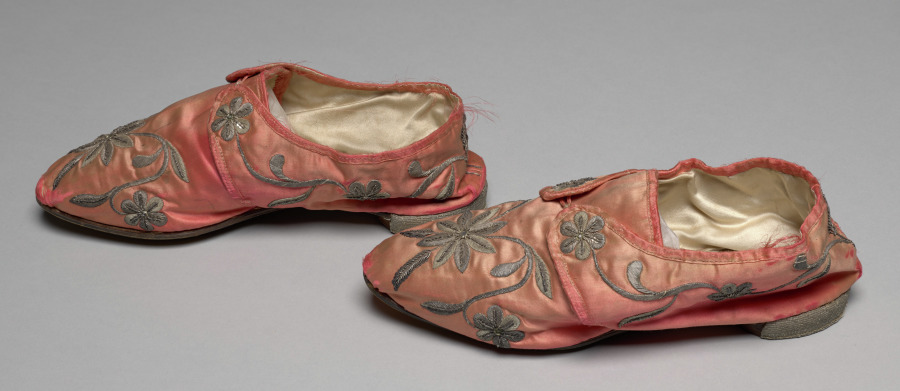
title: Pair of Slippers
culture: Italy, Venice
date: early 1700s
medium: Silk: satin weave with silver metal thread embroidery and trim; spangles; leather soles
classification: Garment